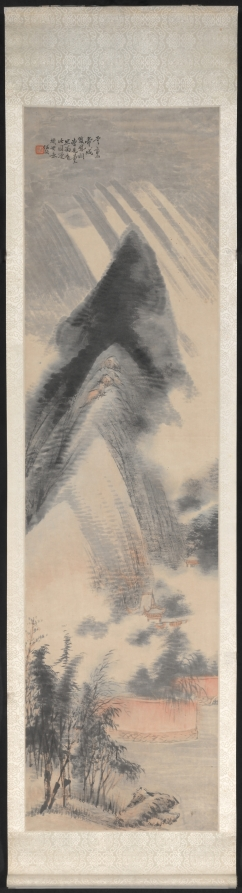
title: Landscape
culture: China, Qing dynasty (1644-1911)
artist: Ren Yu (Chinese, 1853–1901)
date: 1892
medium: Hanging scroll; color on paper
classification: Painting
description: This seasonal landscape is from a set of four hanging scrolls by Ren Yu. He was the youngest, most eccentric, and least prolific of the Four Rens, a family of prominent painters in Shanghai during the late Qing dynasty (1644–1911). Perhaps due to his opium habit and subsequent financial difficulties, Ren Yu tended to be lackadaisical in his work. The few remaining high-quality paintings hint at his artistic potential lost to opium. Though Ren’s premature death left his artistic promise unfulfilled, his paintings were acquired and donated to the museum by Charles Lang Freer (1854–1919), a wealthy businessman and art collector from Detroit. As Freer had hoped, this donation of Ren Yu paintings inspired the young Cleveland Museum of Art to continue to expand its own Chinese painting collection.